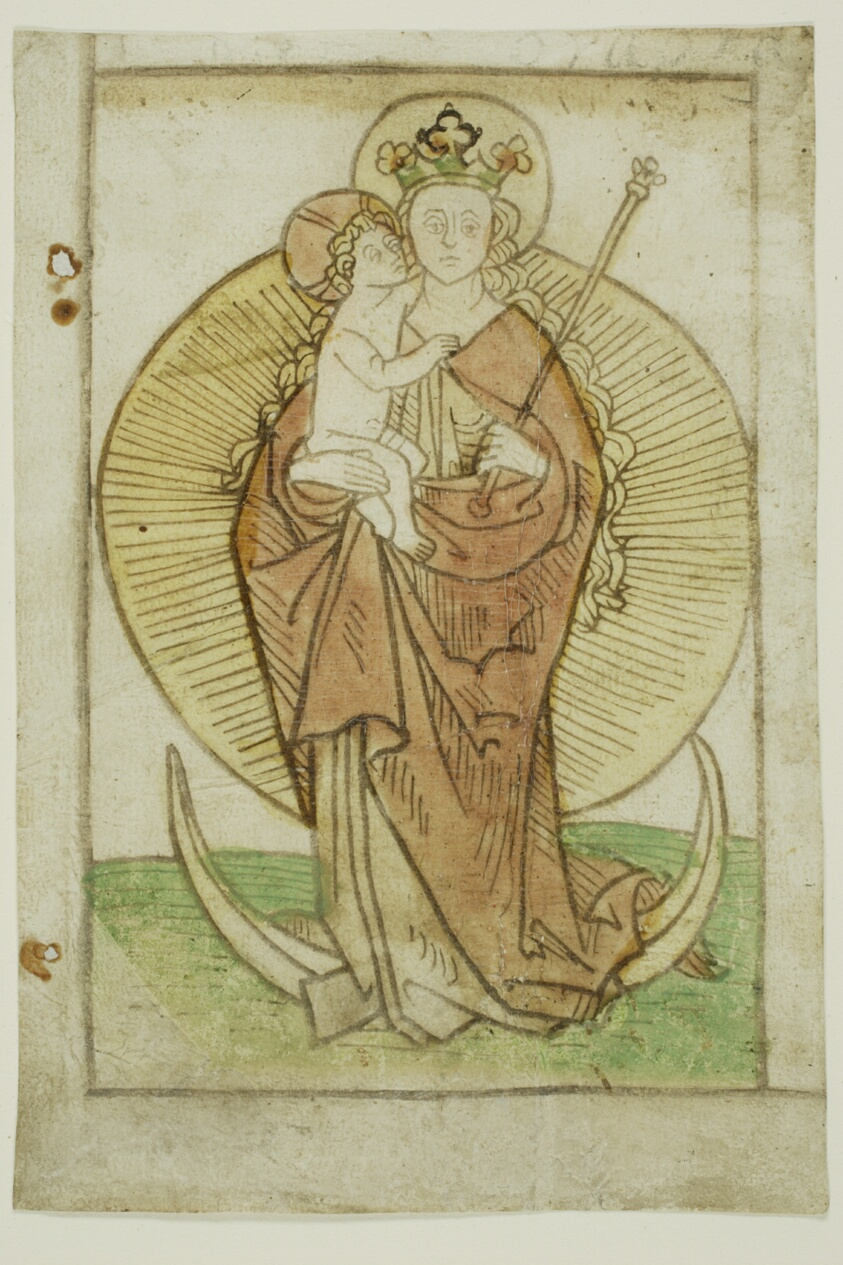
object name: Print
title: The Virgin and Child with Crown and Sceptre on a Crescent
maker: Unknown Artist; Southern Germany, mid-15th century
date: c. 1460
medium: Woodcut printed in dark brown through rubbing, hand-colored in red lacquer, yellow, and green, on cream laid paper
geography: Germany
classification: woodcut; print; prints and drawing